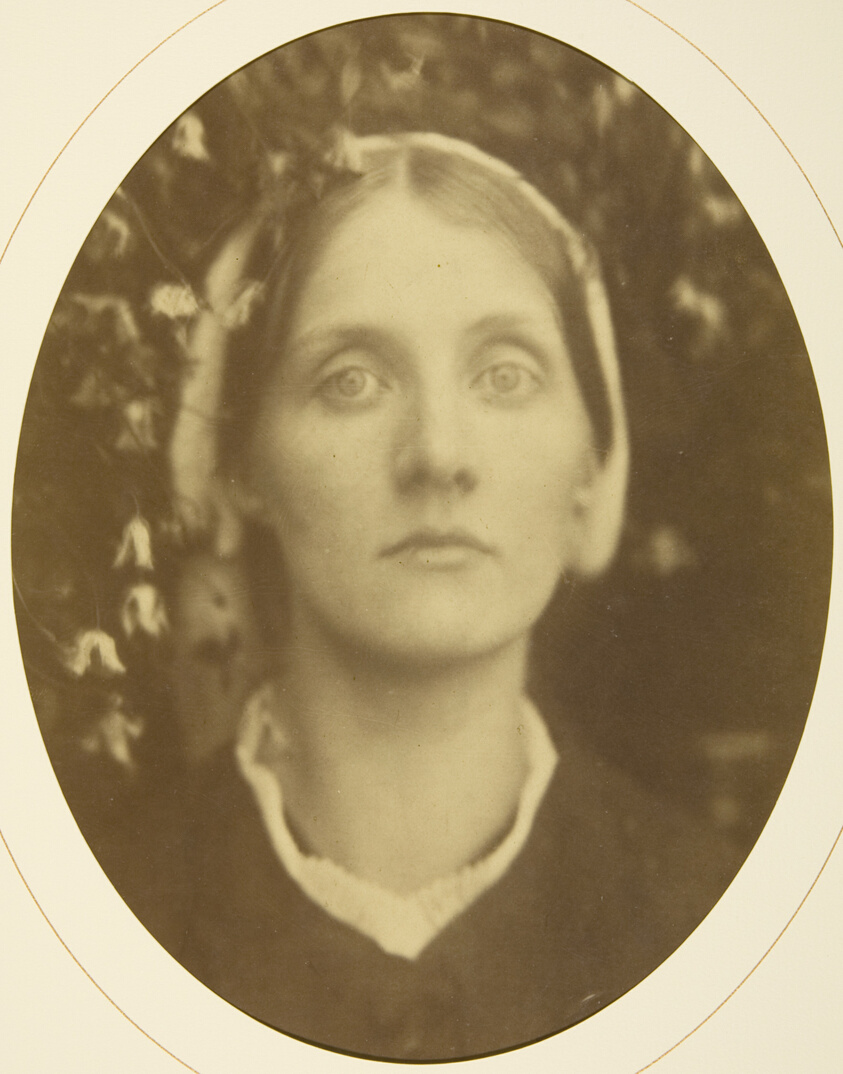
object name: Photograph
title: Mrs. Herbert Duckworth, ("A Beautiful Vision")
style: 19th century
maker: Julia Margaret Cameron (English, 1815–1879)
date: 1872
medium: Albumen print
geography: England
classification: albumen silver print; photographic process; photography; photograph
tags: portraits, portraits: female subject, photography